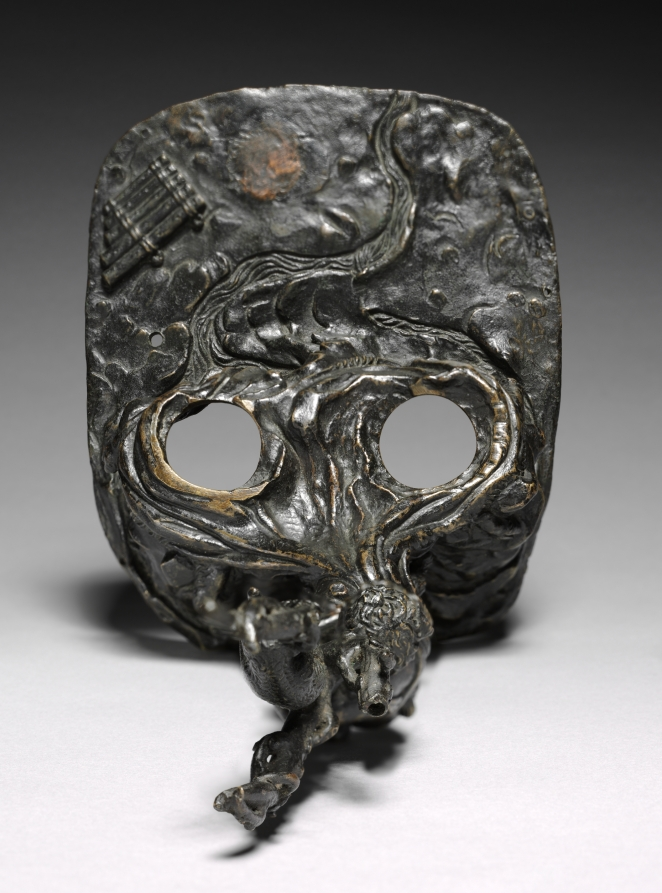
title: Base for a Satyr and Satyress Group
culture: Italy, possibly Padua, early 16th century or later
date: early 1500s or later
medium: bronze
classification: Sculpture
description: The pagan subject matter here was common in the 1500s and, with the pan pipes on the ground, indicates a scene of poetry and music. Long thought to be an ink stand, the two openings are now understood as possibly having housed a satyr and satyress.